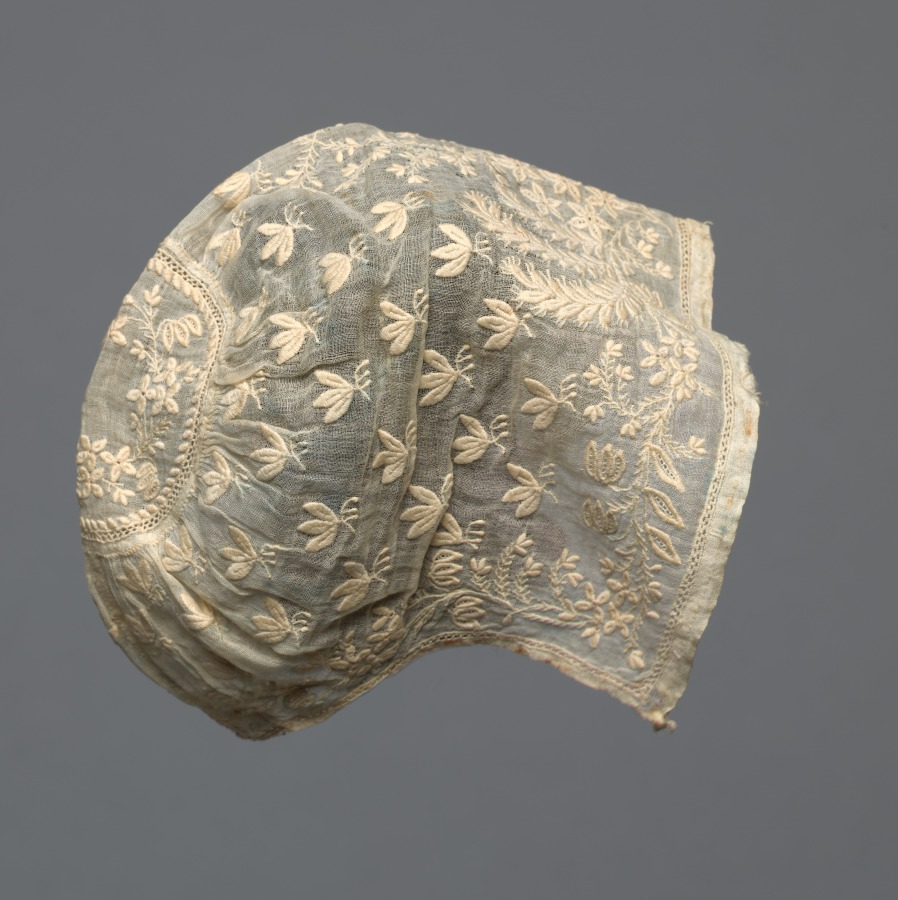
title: Cap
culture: America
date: c. 1836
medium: Linen: embroidered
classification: Embroidery